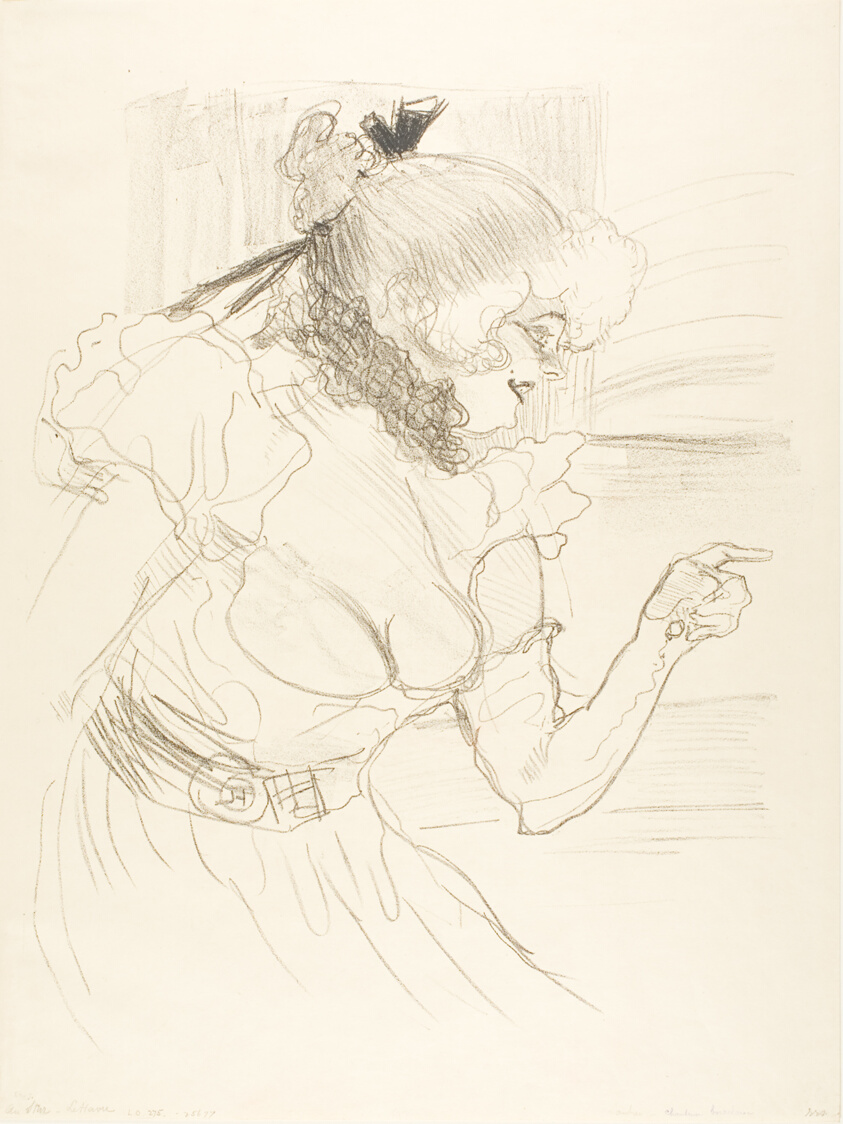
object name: Print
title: At the Star, Le Havre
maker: Henri de Toulouse-Lautrec (French, 1864-1901)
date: 1899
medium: Lithograph on cream wove paper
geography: France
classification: lithograph; print; prints and drawing